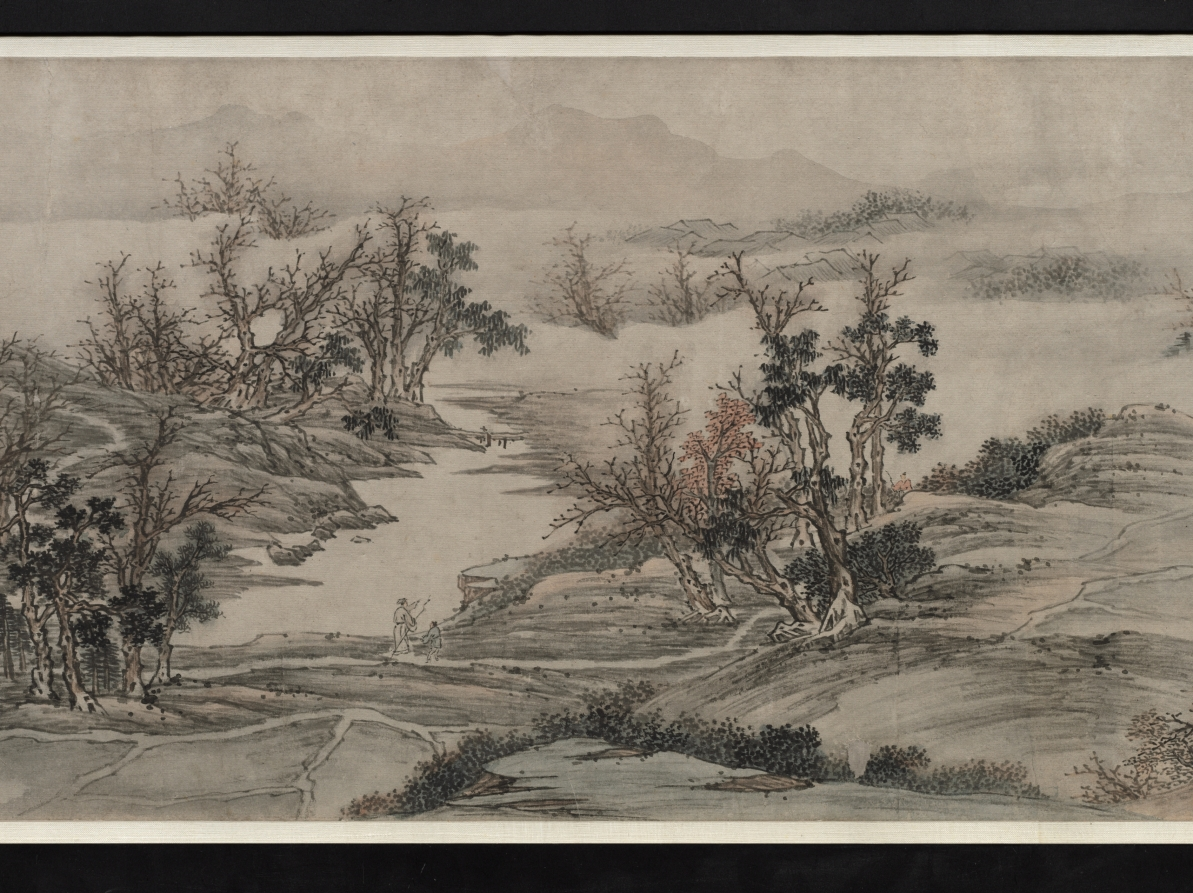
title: Autumn Mist in the Countryside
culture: China, Qing dynasty (1644-1911)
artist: Zou Zhe (Chinese, c. 1610-before 1688)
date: 1647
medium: handscroll, ink and color on paper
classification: Painting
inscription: Artist's inscription, signature, and seal: The first day of the sixth lunar month, the ting-hai year [1647], Tsou Che painted [this]. [seal] Fang-lu.